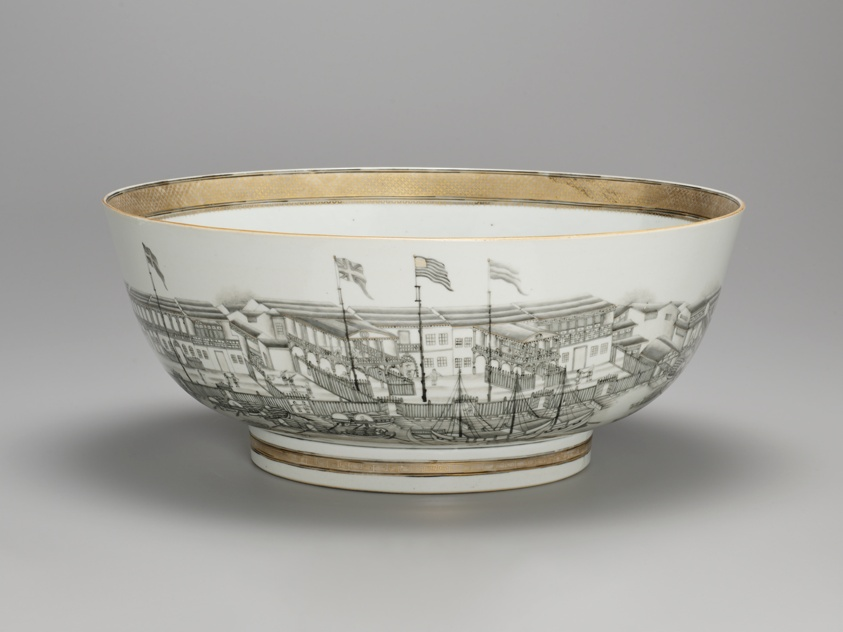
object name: Ceramics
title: Punch Bowl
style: chinese export, Export porcelain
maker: Artist unknown (Chinese, made for the American market); China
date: c. 1789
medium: Hard-paste porcelain, glaze, enamels in colors, gilding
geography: China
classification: punch bowl; chinese export porcelain; American market; art of the americas; ceramics; porcelain; decorative arts; pottery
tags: Canton, factory, port, cities, building, drinking